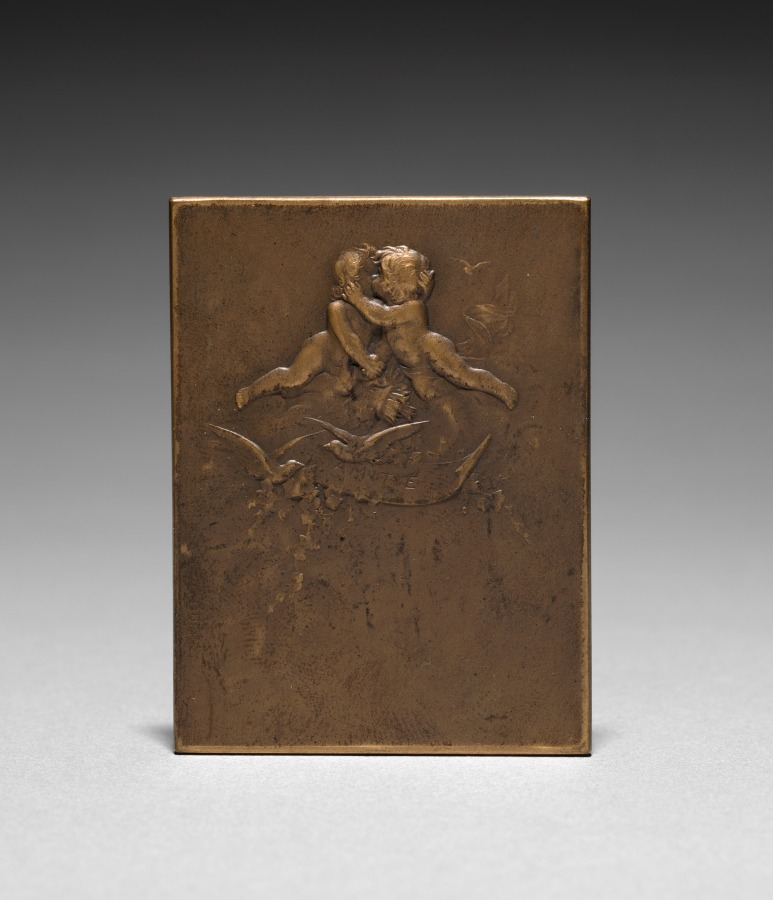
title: Medallion (reverse)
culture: France, 19th-20th century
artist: Jules Dupré (French, 1811–1889)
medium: bronze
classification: Metalwork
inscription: "AMITIÉ"; signed: "G. Dupré."